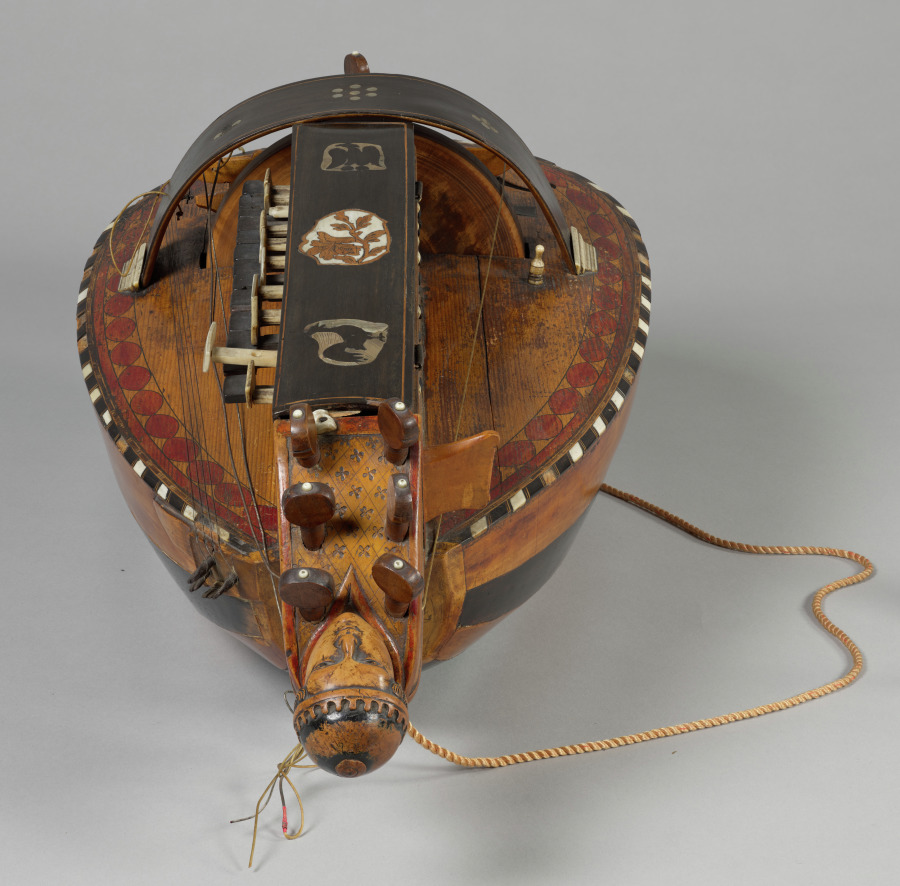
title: Vielle à Roue (Hurdy-Gurdy)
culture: France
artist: Jacques Decante (French, 1808–1884)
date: 1865–70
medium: Wood; mother-of-pearl inlay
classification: Musical Instrument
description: In France, the hurdy-gurdy is known as the vielle à roue (wheel fiddle). This six-stringed musical instrument produces sound by a hand crank-turned wheel that rubs against the strings. The wheel functions much like a violin bow, and single notes sound similar to those of a violin. Melodies are played on a keyboard that presses small wedges against the strings to change their pitch.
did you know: This vielle à roue was made in the French village of Jenzat, which was the manufacturing center for hurdy-gurdies during the 19th century.